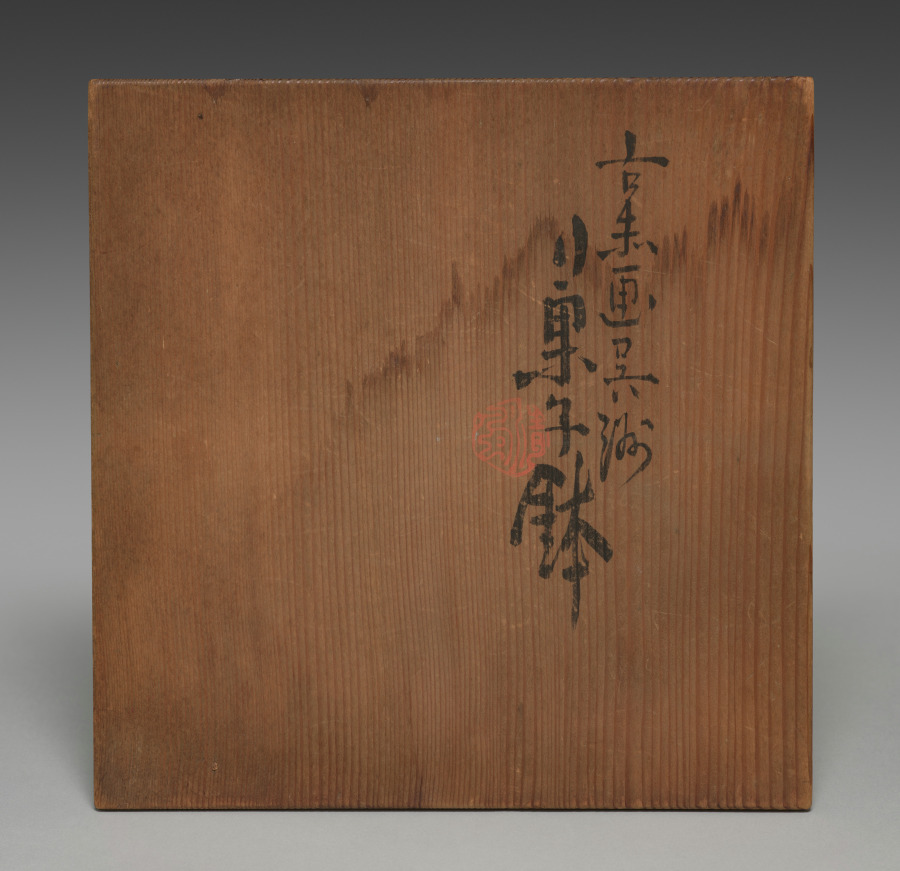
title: Bowl with Auspicious Ideographs and Floral Motifs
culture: China, Ming dynasty (1368–1644)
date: 1600s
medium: Stoneware with overglaze color enamels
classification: Ceramic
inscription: 長,命,富,貴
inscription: 【印】清風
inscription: 【印】大日本清風造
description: As part of their work, members of the Seifu studio, and Seifū Yohei III (三代清風与平, Japanese, 1851–1914), in particular, engaged in the viewing and appreciation of Chinese ceramics. While they were not authenticators, they would have been familiar with imported examples of Chinese stoneware and porcelain through tea gatherings, meetings with their elite clients, exhibitions, and other opportunities to see and study actual pieces from the mainland. This object and its box may be a reflection of Yohei III’s experiences of this kind. The bowl itself is slightly misshapen and roughly glazed with overglaze color enamels in red and green. Flanked by floral motifs, four Chinese characters brushed in red appear in roundels: 長命富貴. Meaning, respectively, longevity, life, prosperity, and status, they are pronounced together in Japanese as the phrase chōmeifūki, or “live long and prosper.” Additional loosely painted foliate designs in red and green circle the area above the foot and inside of the bowl. It is a relatively simple piece made by someone who was likely capable of much finer, more precise work but who could also do completely passable wares on short order. Of greater interest is the storage box lid for this piece. It has an inscription by Yohei III, with his seal, declaring it to be a “sweets dish from southern China with color images.” On the reverse of the lid, Yohei has written his name and placed his Imperial Household Artist seal, but instead of writing “made by,” he wrote “saw this [ceramic].” To the left of this is another inscription in a different hand, stating that the piece is a work from southern China with red-painted designs, produced at the very end of the Ming dynasty. It is signed “Kushi Takushin 久志卓真," along with his seal. Kushi Takushin (1898–1973) was a Japanese musician and music critic, as well as an antiques researcher and authenticator. He was especially interested in Ming dynasty Chinese ceramics and wrote extensively on Chinese, Japanese, and Korean ceramics. Originally from Hokkaido, he was active in Kyoto and began collecting art at a young age. Both he and Yohei appreciated and commented upon the bowl, and perhaps they both owned it.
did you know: Each roundel contains an auspicious word conveying good wishes for a long life and wealth.